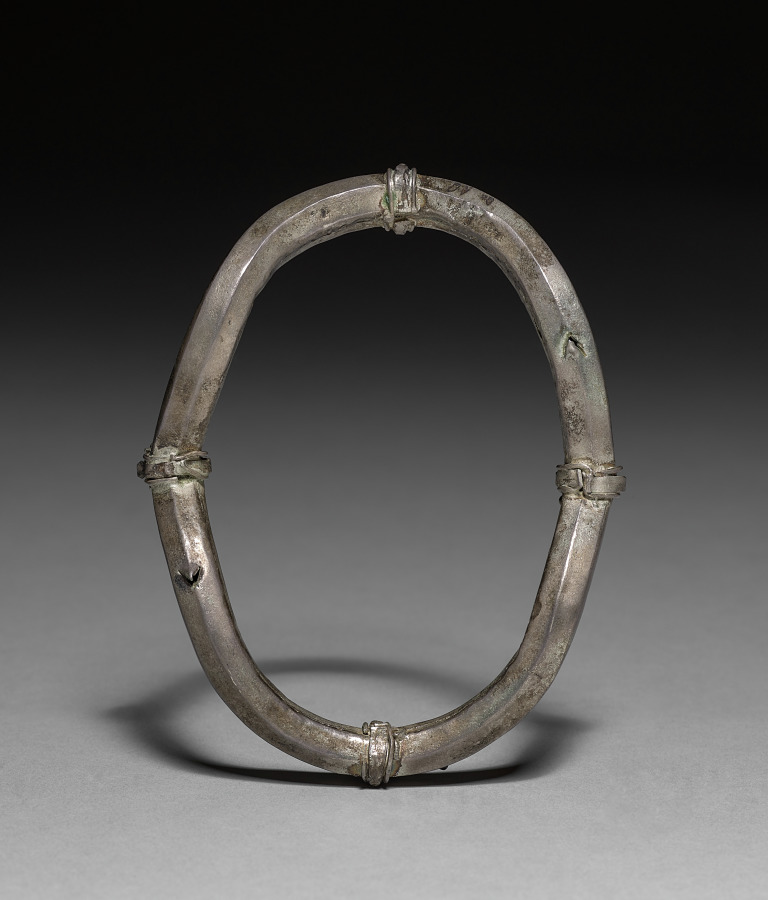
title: Foot Ornament (padasara)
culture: South India, Mysore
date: 1800s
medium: silver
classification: Jewelry